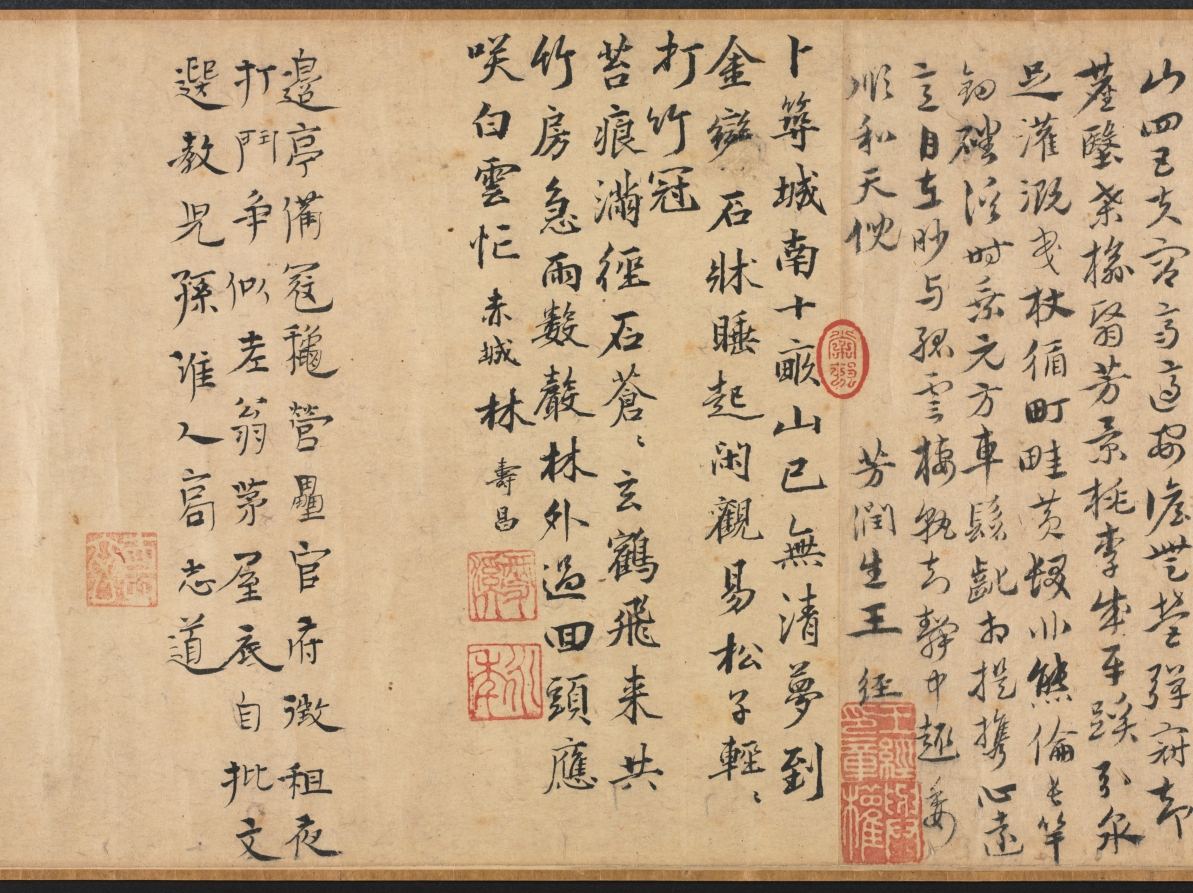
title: Leisure Enough to Spare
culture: China, Yuan dynasty (1271-1368)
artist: Yao Tingmei (Chinese, active mid-1300s)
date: 1360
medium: handscroll, ink on paper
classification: Painting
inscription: 至正廿年春正月_日作此併系鄙語于尾 地偏人遠閉柴關，滿院松陰白晝閒。 眼底風塵渾忘却，坐看流水臥看山。 吳興姚廷美畫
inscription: 23 colophons and 53 seals (dates unavailable for some): 1 colophon, dated 1360, and 2 seals of Yang Weizhen (1296-1370); 1 colophon and 3 seals of Wan Yi; 1 colophon of Zhang Junde; 1 colophon and 3 seals of Angji (act. ca. mid-14th c.); 1 colophon and 1 seal of Xu Shiquan; 1 colophon and 3 seals of Gao Yu; 1 colophon and 2 seals of Li Mingfu; 1 colophon and 2 seals of Lu Lin; 1 colophon and 1 seal of Zhang Qian; 1 colophon of Tao Tangwen; 1 colophon and 1 seal of Wu Yuangui (act. ca. 1300-60); 1 colophon of Bao Jiong; 1 colophon of Wang Zao; 1 colophon and 1 seal of Ma Chuyi; 1 colophon and 1 seal of Lin Yizhuang; 1 colophon and 1 seal of Gu Shunju; 1 colophon and 2 seals of Wang Jing; 1 colophon and 2 seals of Lin Shouchang; 1 colophon and 1 seal of Gao Zhidao; 1 colophon of Lin Xun; 1 colophon, dated 1359, and 2 seals of Meng Weicheng (act. mid-14th c.); 1 colophon and 1 seal of Meng Zhiji (act. mid-l4th c.); 14 seals of Liang Qingbiao 梁清標 (1620-1691); 1 poem dated 1755 and 5 seals of the Qianlong 乾隆 emperor (r. 1736-95); 2 seals of the Jiaqing 嘉慶 emperor (r. 1796-1821); 3 seals of the Xuantong 宣統 emperor (r. 1909-11).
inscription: Title on frontispiece by Zhang Bi 章弼: Signed Gongchen 拱辰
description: Seclusion and leisure—the ideals of the literati, or scholar-gentlemen—are expressed in this mature work by Yao Tingmei. The theme acquired special meaning at a time of the military uprisings near the end of the Yuan dynasty. Dedicated to an ascetic named Du, this work combines painting, calligraphy, and poetry; following the painting are more than 20 poems and essays written by notable scholars, one of whom was the calligrapher Yang Weizhen. It reveals not only the aesthetic taste of the literati but also the practice of contributing artistic and literary works to fulfill social obligations. Yao's painting demonstrates his individual style derived from various ancient masters (Guo Xi, Dong Yuan, and Juran). Yang Weizhen's calligraphy exhibits his bold, vigorous style and his intent to capture the spirit of antiquity in art.